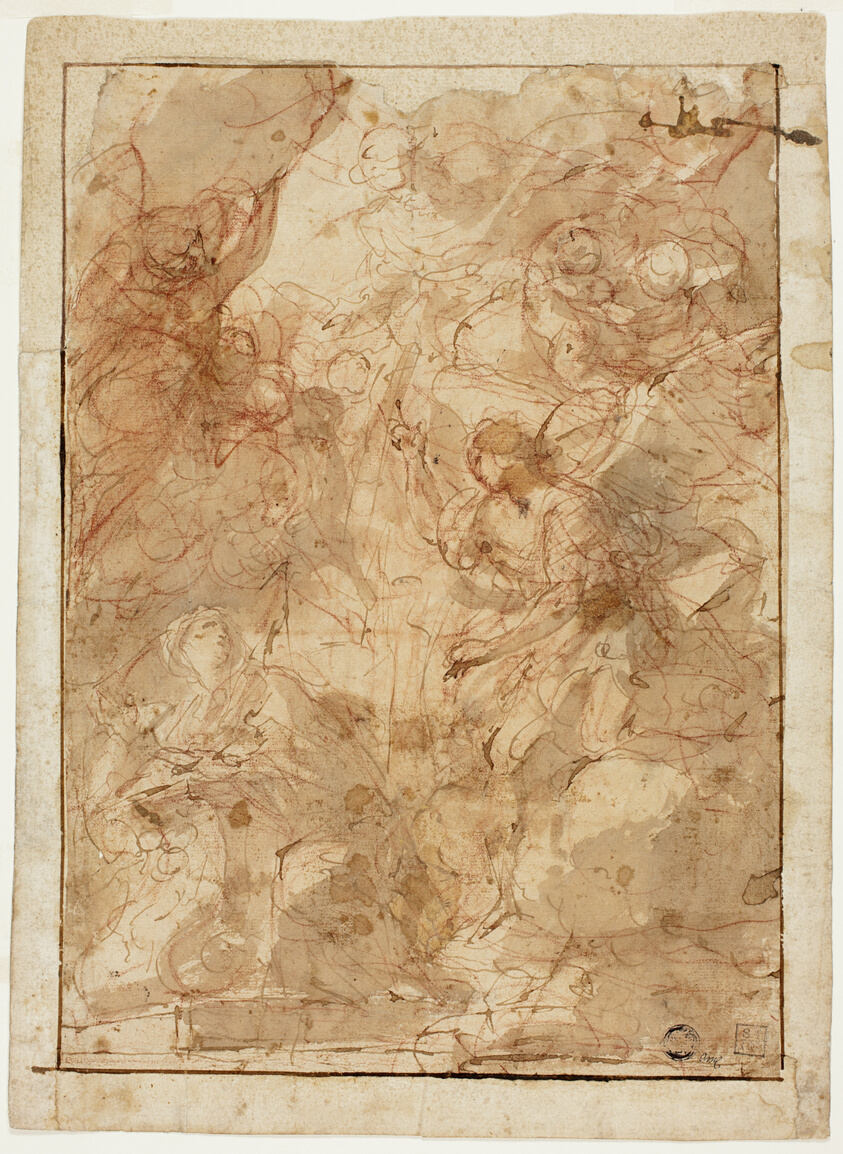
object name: Drawing and Watercolor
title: Study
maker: Unknown Italian artist; possibly Valerio Castello (Italian, 1624-1659); possibly Luca Giordano (Italian, 1632-1705)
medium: Pen and brown ink with brush and brown wash, with red chalk, on buff laid paper, false margins added, red chalk sketch of figures on verso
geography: Italy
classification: drawings (visual works); prints and drawing